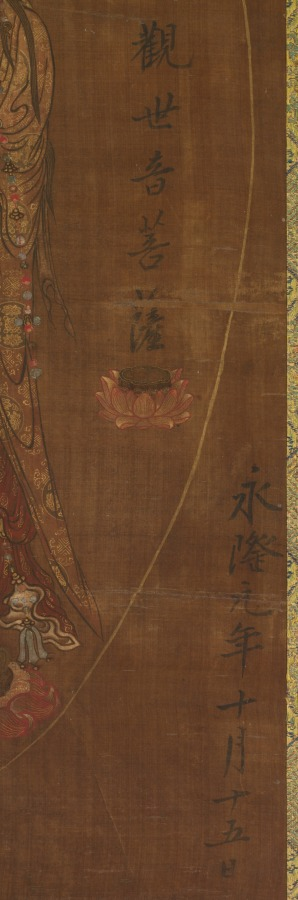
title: Buddha Amitābha with Two Attending Bodhisattvas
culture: China, Southern Song dynasty (1127-1279)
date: 1200s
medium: Hanging scroll; ink and color on silk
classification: Painting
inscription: 南無阿彌陀佛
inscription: 沙門善導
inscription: 觀世音菩薩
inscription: 大勢至菩薩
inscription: 永隆元年十月十五日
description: The supreme deities that rule over the Western Paradise—Amitābha (阿彌陀 in Chinese), Avalokiteśvara (Guanyin 觀音), and Mahāsthāmaprāpta (Dashizhi 大勢至)—are here enclosed within a circle of light. To secure entry into that paradise for Buddhist followers of the Pure Land sect, one must recite the phrase namo amituofo (南無阿彌陀佛, Homage to the Buddha Amitābha). Here the phrase is repeated 10 times in calligraphy above the figures, reinforcing the need for continual recitation.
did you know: Each line of calligraphy, which invokes the Buddha's name, emerges from a lotus blossom.